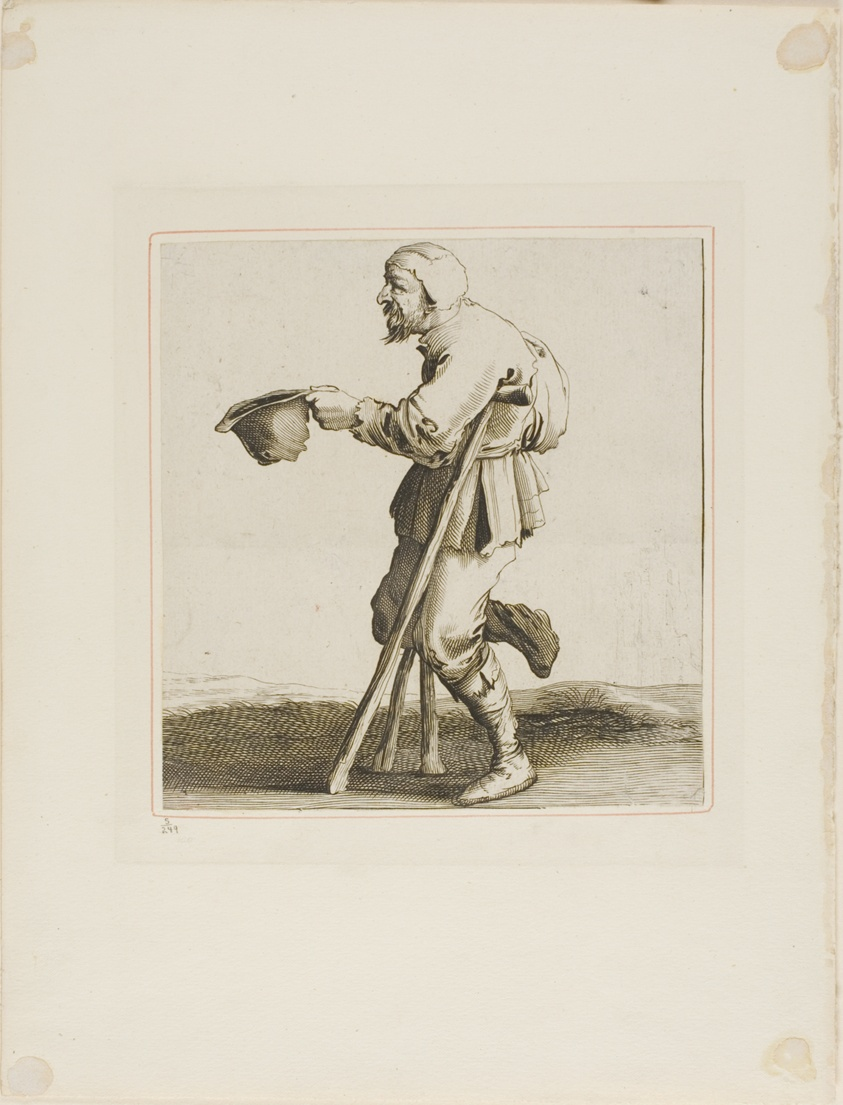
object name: Print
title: Lame Beggar Asking for Alms, from T is al verwart-gaern (It's already confusing)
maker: Pieter Jansz Quast; Dutch, 1606-1647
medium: Etching in black on paper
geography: Netherlands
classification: engraving; print; prints and drawing